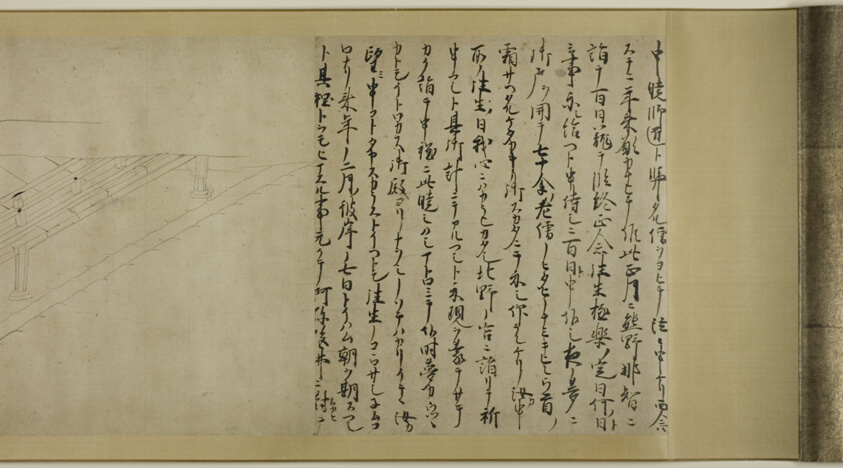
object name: Book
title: The Story of Sugawara no Michizane (Kitano Tenjin Emaki Dankan)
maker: Unknown Artist (Japanese, active in 14th century)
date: 14th century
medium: Handscroll; ink on paper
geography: Japan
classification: handscroll; painting; asian art